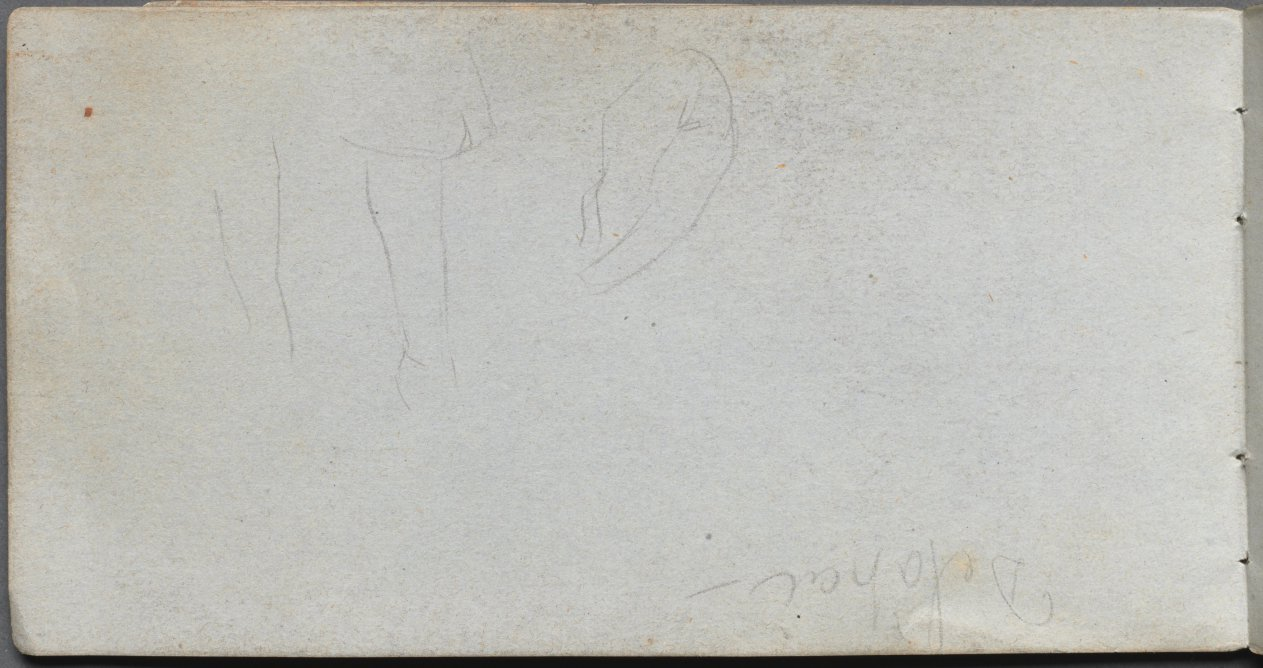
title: Sketchbook, page 2: Studies of Legs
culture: France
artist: Ernest Meissonier (French, 1815–1891)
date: c. 1860s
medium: graphite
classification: Bound Volume